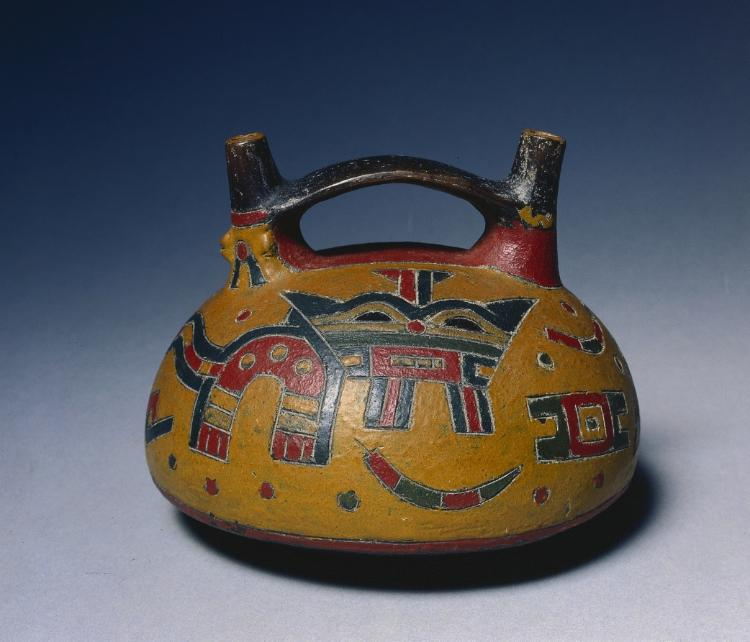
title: Vessel with Feline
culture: Peru, South Coast, Paracas (Cavernas) style (700 BCE–1 CE)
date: 700 BCE–1 CE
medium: earthenware, resin-based paint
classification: Ceramic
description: Little is known of the meaning of the beautifully abstracted felines so often incised on Paracas ceramics. The designs achieve much of their complexity through color applied as resin-based paint after the vessel was fired in a smoky atmosphere that blackened its surface. Two spouts joined by a bridge appear on many fine South Coast ceramics. The form probably had meaning, now lost.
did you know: Small, wild, reclusive felines, pampas cats live on the margins of agricultural fields, where they prey on rodents and other pests that are a farmer’s bane